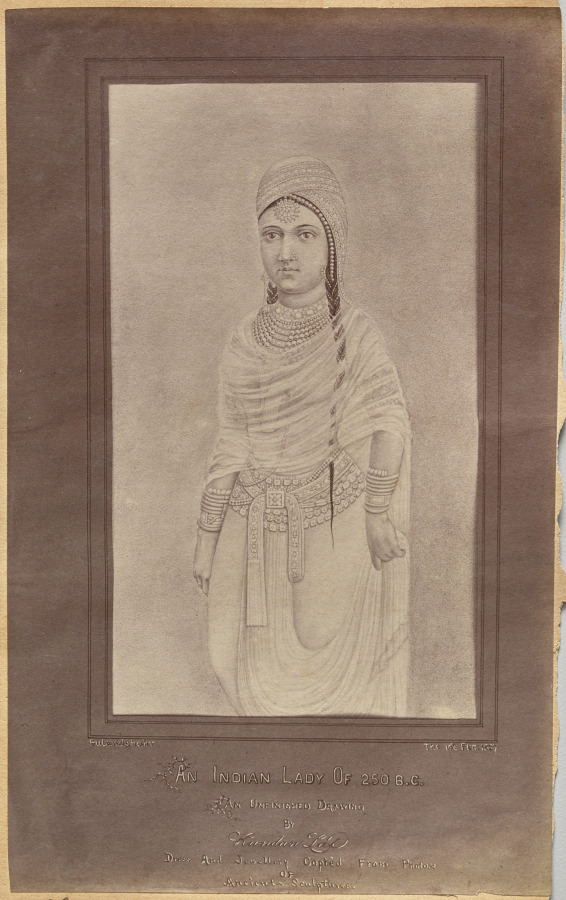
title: Indian Lady 250 BC (verso, right)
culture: India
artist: Raja Deen Dayal (Indian, 1844–1905)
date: c. 1882–87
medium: albumen print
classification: Photograph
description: These photographs are part of an album, now disassembled, of around 105 photographs taken in India between 1885 and summer 1887 that provide glimpses into the lives of the British colonial elite and royal and upper-class Indians. The museum holds another group of 37 pictures from this album (2016.266), which was probably commissioned by a British civil servant visiting or working in India around 1888 as a personal souvenir of his experiences there.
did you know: Raja Deen Dayal is regarded now, and was considered during his lifetime, to be India’s most important 19th-century photographer.